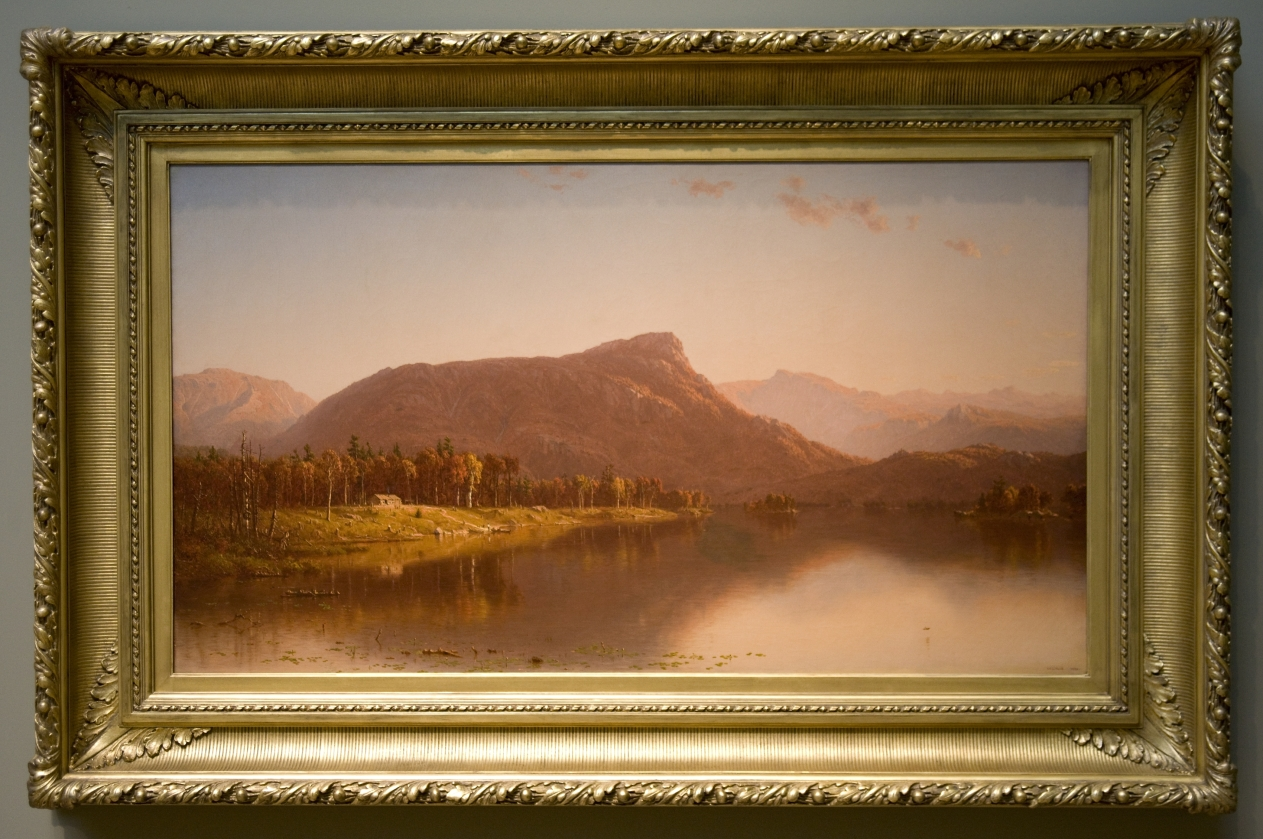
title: A Home in the Wilderness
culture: America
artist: Sanford Robinson Gifford (American, 1823–1880)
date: 1866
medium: oil on canvas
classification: Painting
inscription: Signed lower right: SR Gifford. 1866.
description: Gifford’s view of Mount Hayes in New Hampshire records human intrusion into a remote landscape. On the left riverbank a log cabin stands amid a recently cleared patch of land with several tree stumps, while figures in its doorway greet a man who has arrived with a canoe of supplies.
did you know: Gifford considered this painting to be one of his finest creations.